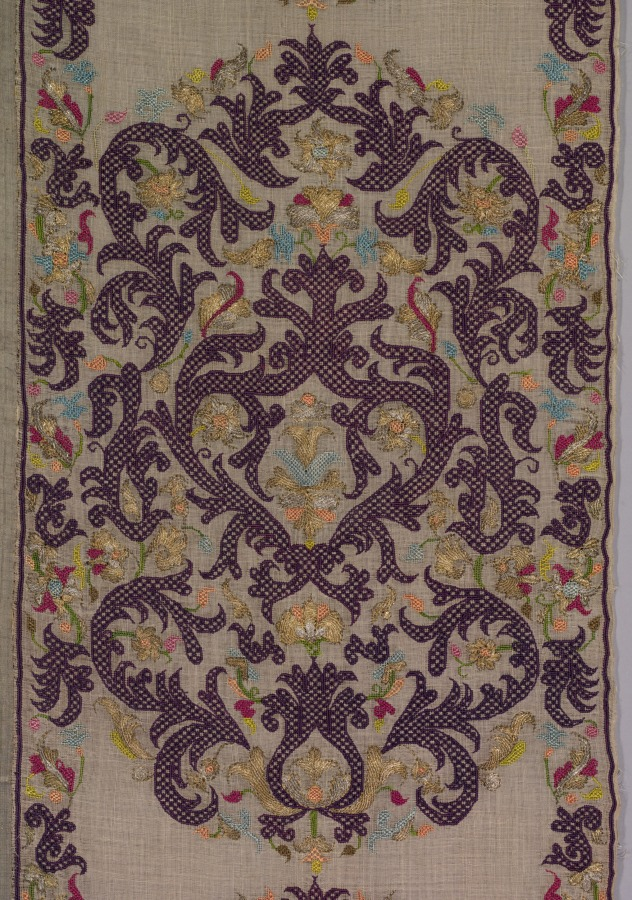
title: Curtain panel (sitara)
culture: Africa, North Africa, Algeria, Algerian weaver and embroiderer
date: 1800s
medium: Linen, silk, gold, silver, dye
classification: Embroidery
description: During the 1700s, stunning large embroidered door curtains such as these hung across doorways onto interior courtyards of multistoried residences. Light entered through their loosely woven linen ground while the reversible embroidered decoration provided beauty and privacy. Such curtains have three embroidered widths, the third missing here, joined by colorful plain silk ribbons flanking a French floral ribbon in the center.